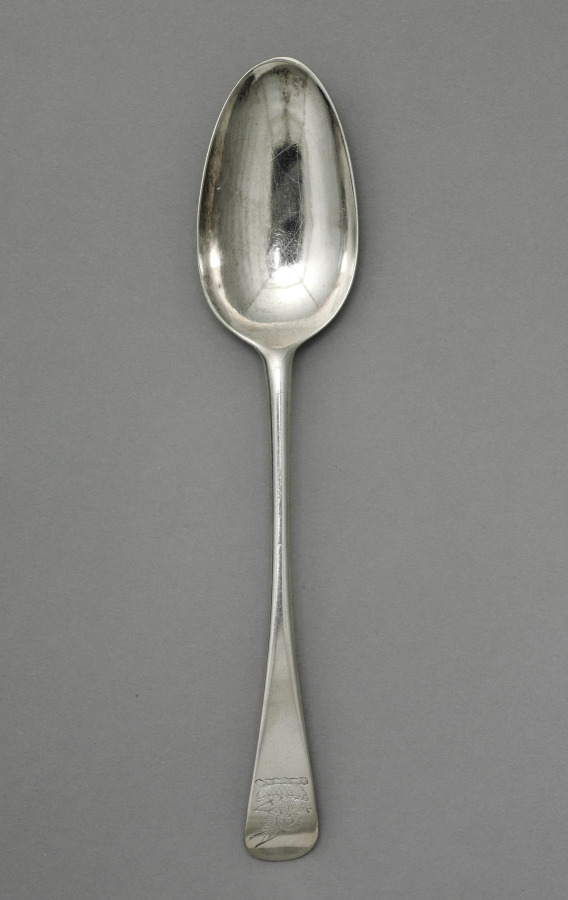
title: Tablespoon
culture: America, Massachusetts, Boston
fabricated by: John Coburn (American, 1725–1803)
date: c. 1760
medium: silver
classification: Silver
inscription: engraved Chandler crest on top of handle end.